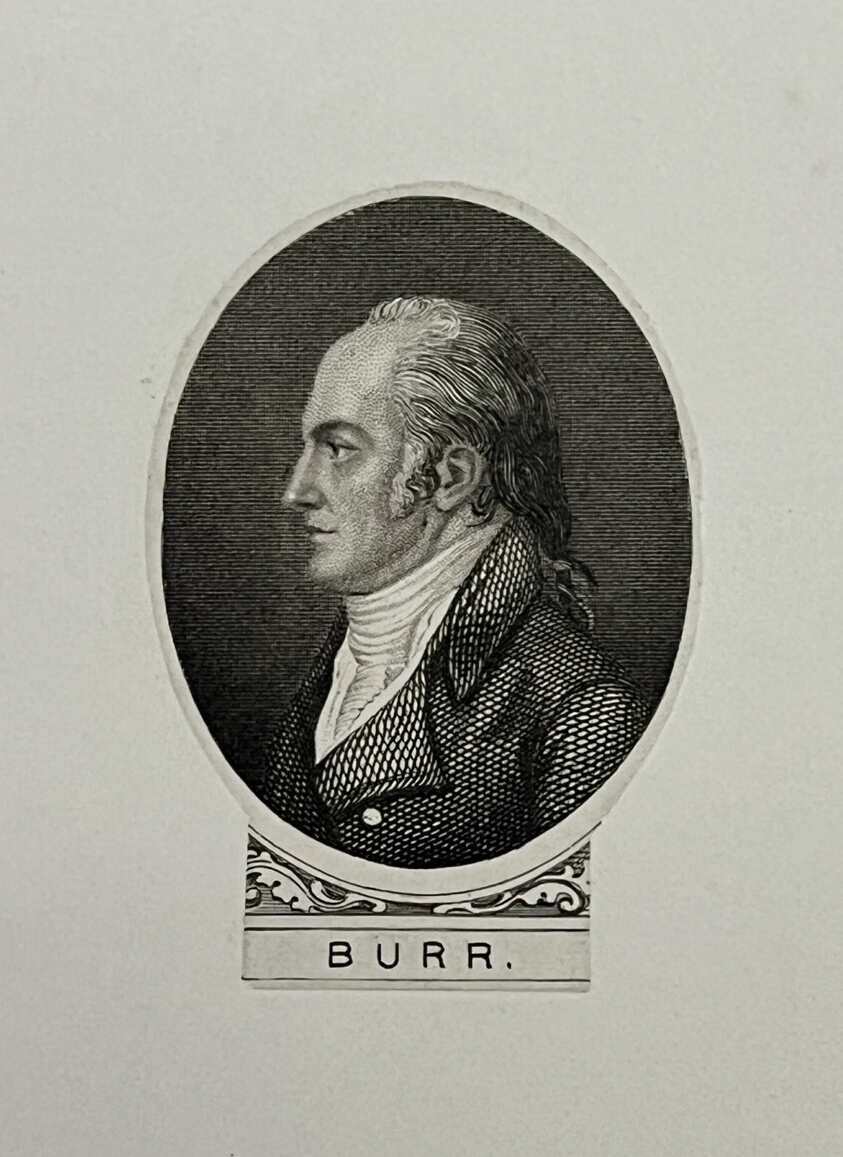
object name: Print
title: Burr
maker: Artist Unknown (Likely American or British, 19th century)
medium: Etching on paper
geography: United States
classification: reproduction; print; prints and drawing